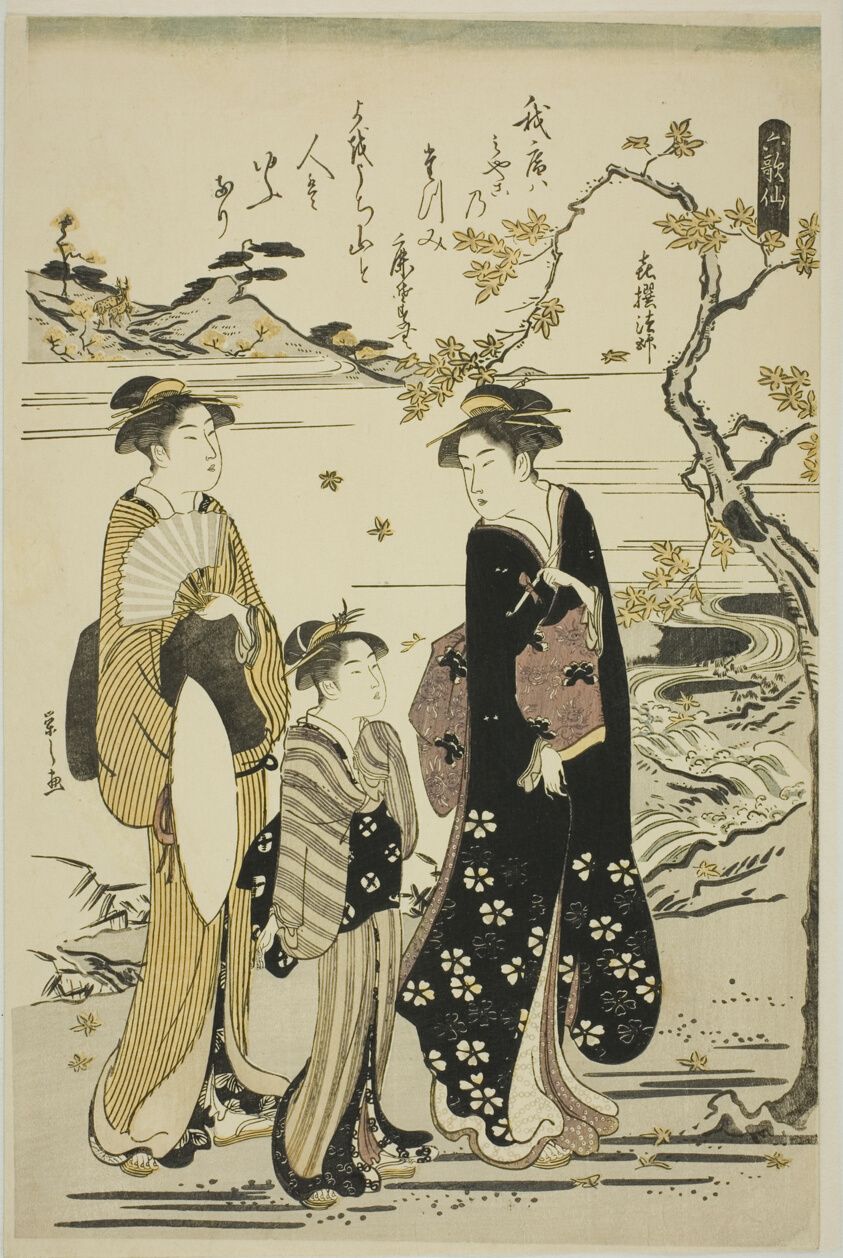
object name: Print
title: The Priest Kisen, from the series "Six Immortal Poets (Rokkasen)"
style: Japanese (culture or style)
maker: Chobunsai Eishi; Japanese, 1756-1829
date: c. 1789/90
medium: Color woodblock print; oban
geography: Japan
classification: woodblock print; print; asian art